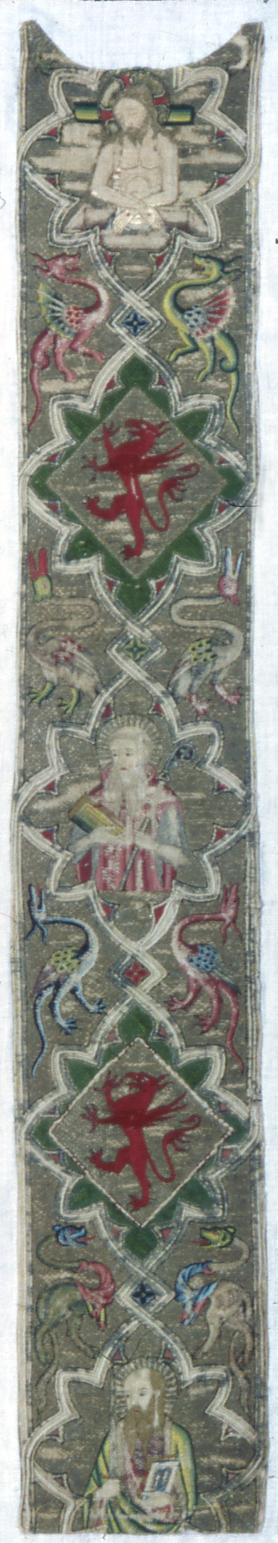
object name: Textile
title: Orphrey Band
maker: Italy, Perugia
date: c. 1390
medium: Linen, plain weave; underlaid with linen, plain weave; embroidered with silk and gilt- and silvered-metal-strip-wrapped silk in satin and split stitches; laid work, couching and padded couching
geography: Italy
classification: textile; needlework (visual works); liturgical